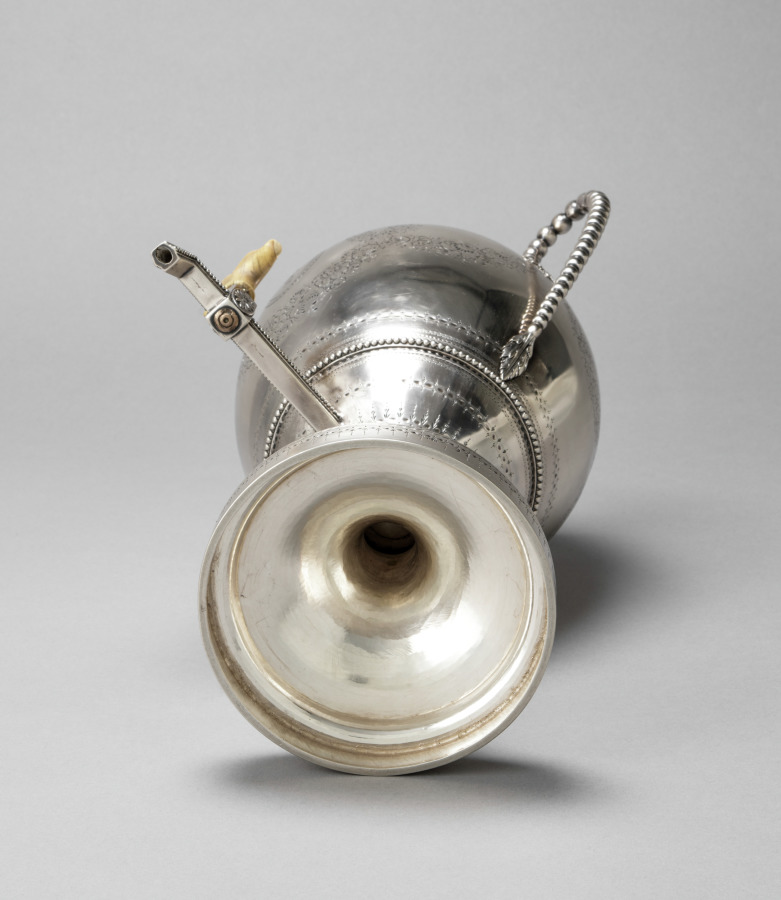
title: Tea Urn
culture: England, London, 18th century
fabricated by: Henry Greenway (British)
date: 1781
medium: silver and ivory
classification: Silver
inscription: engraved on body: coat of arms-- tower surrounded by three covered cups; crest consisting of a squirrel. Engraved on cover: crest consisting of a squirrel (coat of arms of Amcotts family).